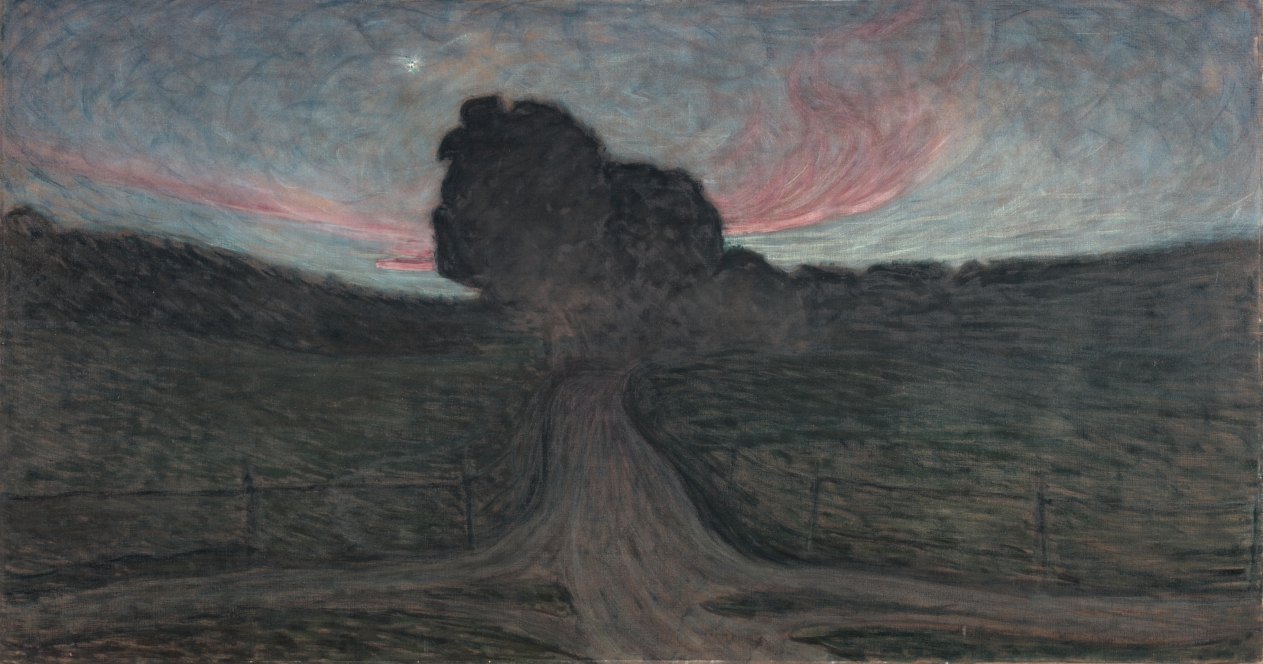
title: Evening Mood-Lidingö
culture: Sweden, 20th century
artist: Eugène Jansson (Swedish, 1862–1915)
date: 1900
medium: oil on canvas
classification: Painting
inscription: Unsigned; inscribed on the stretcher in blue ink, "A. Jansson' (the artist's brother) and "HERR R. BERGH, 40 BAS 4 TR OG JANSSON'. Inscribed on the stretcher in red ink "G.J.'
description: The swirling brushstrokes and telescopic perspective in this view of a field near Stockholm, Sweden, converge on the dark mass of trees and dying sunset in the center. Feelings of melancholy and loneliness are relieved only by the appearance of the first evening star. Although little known in the United States, Eugène Janssen was one of the most important artists of Scandinavian modernism. He became aware of the works of the Norwegian Symbolist Edvard Munch as early as 1884 and shared Munch’s ambition of exploring psychological states of mind rather than adhering to external appearances.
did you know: Jansson, known as the "Blue Painter," was called "Paraffin Jansson" by other artists because the light in his paintings reminded them of the light from the paraffin (kerosene) lamps widely used in houses at the time.